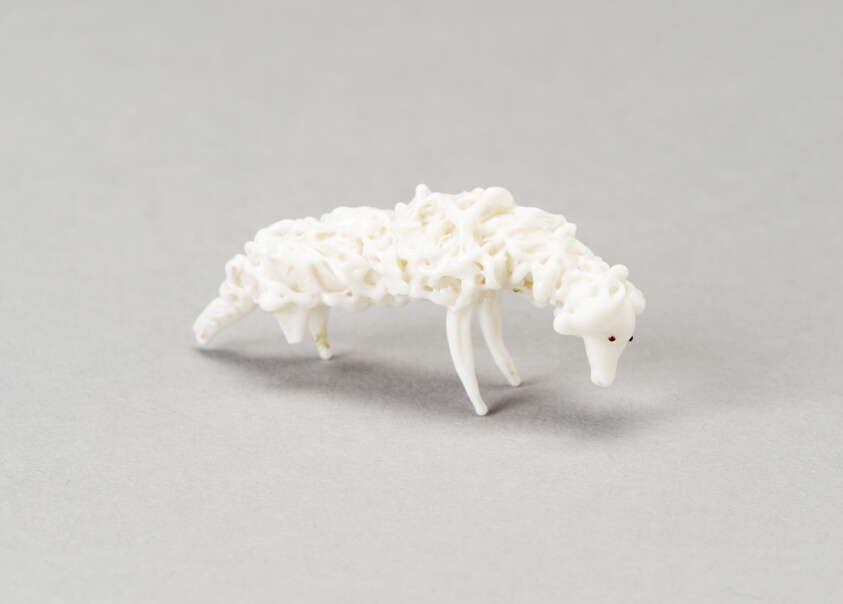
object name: Glass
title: Grazing Lamb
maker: Nevers, France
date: 18th century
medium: Glass; lampwork (verre de Nevers), metal armature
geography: France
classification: decorative object/ornament; lampwork; glass; european decorative arts